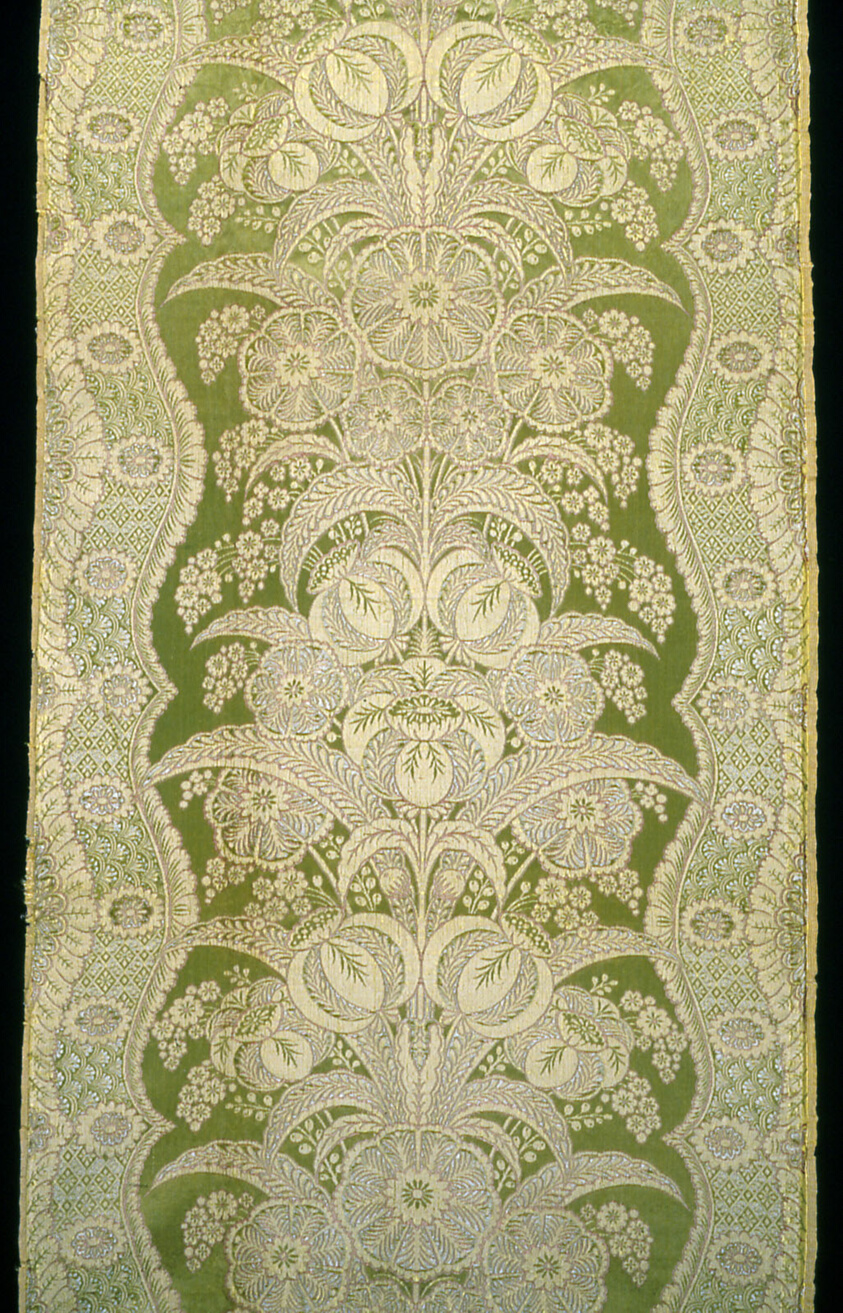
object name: Textile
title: Panel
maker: France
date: 19th century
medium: Silk, satin weave with supplementary patterning wefts, self-patterning ground wefts bound in twill interlacings and plain interlacings of secondary binding warps and ground wefts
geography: France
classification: textile; weaving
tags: lace, fruit, foliage, flowers